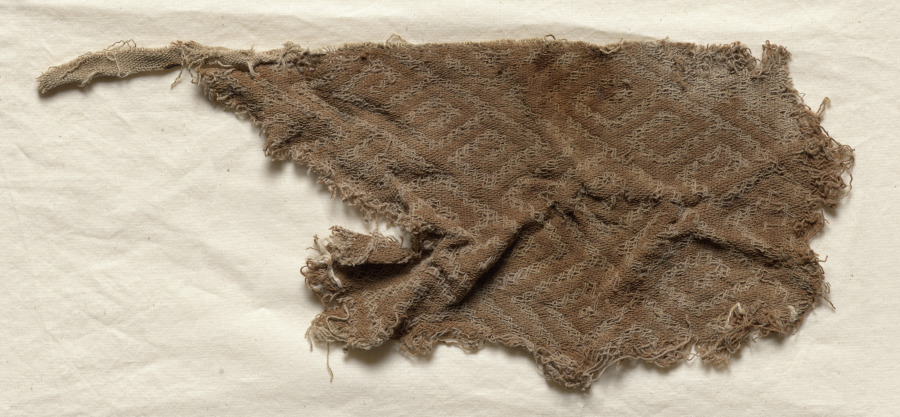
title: Textile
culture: Peru, Central Coast, Chancay, 12th-15th century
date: c. 1100–1400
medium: double cloth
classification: Textile